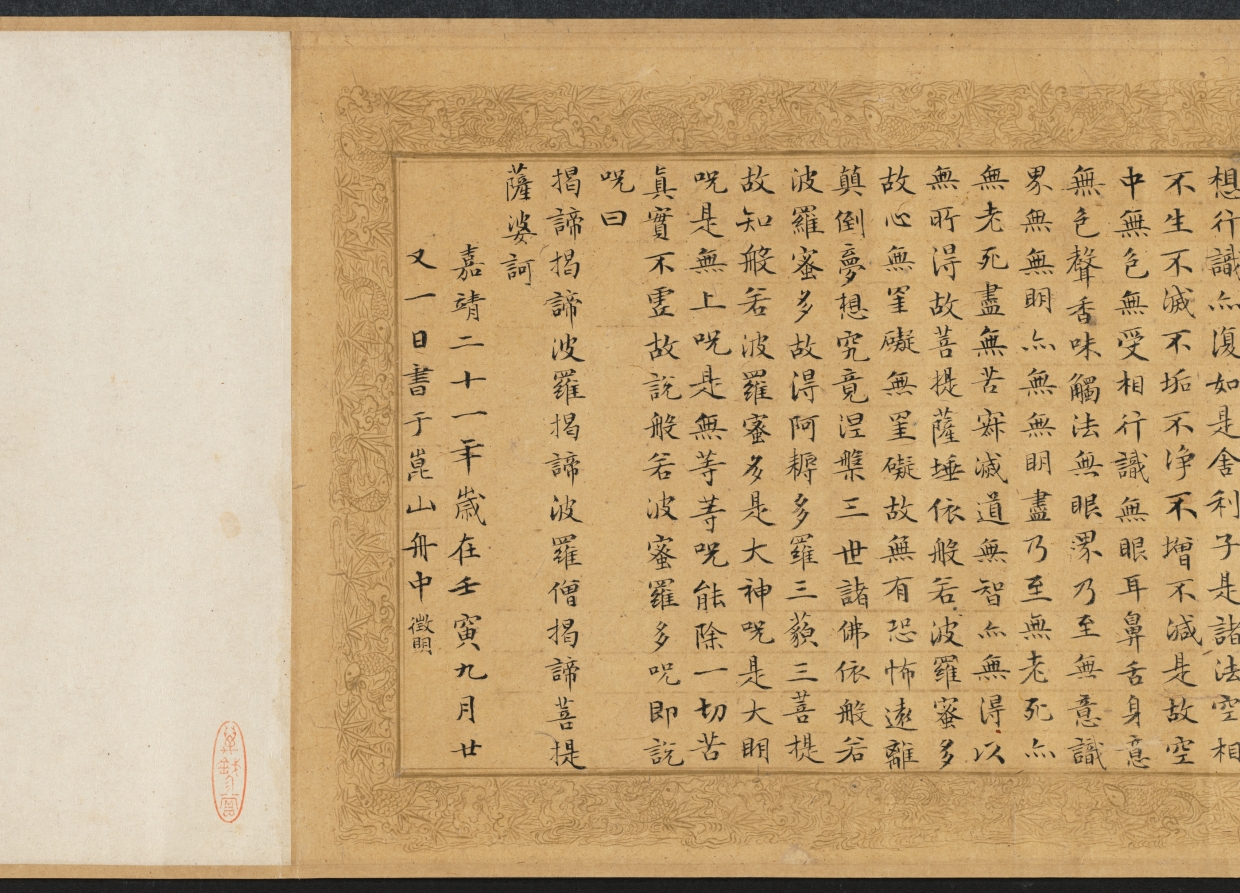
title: Zhao Mengfu Writing the Heart (Hridaya) Sutra in Exchange for Tea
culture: China, Ming dynasty (1368–1644)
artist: Qiu Ying (Chinese, 1494–1552)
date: 1542–43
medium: handscroll, ink and light color on paper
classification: Painting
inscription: Inscription accompanying text of "Heart" sutra, by Wen Zhengming 文徵明 (1470-1559): Zhengming 徵明, written in a boat at Kunshan 崑山, on the twenty-first day of the ninth month, in the renyin 壬寅 year, the twenty-first year of the Jiajing era [1542].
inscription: Colophon by Wang Shih-mou: Chou Yü-shün [Feng-lai] of K'un-shan was a scholarly, refined connoisseur of antiquities. He had acquired the poem written by Chao Ch'eng-chih [Chao Meng-fu] about the exchage of tea for Chao's calligraphy of the Prajna sutra. But the sutra itself, also written by Chao Meng-fu, is lost. He therefore asked Ch'iu Shih-fu [Ch'iu Ying] to do a painting and had Wen Cheng-ming, the artist-in-attendance, write the Hridaya Sutra in the "small, regular" style for replacement. Both works are so excellent that even Chao Meng-fu himself would certainly applaud if he should be reborn to see them. I, Shih-mou, had gotten possession of this scroll from the family of Chou Yü-shün, and since it was so wonderfully matched with one of the treasures in my collection. the Hridaya Sutra written by Chao Meng-fu for Priest Li in "running script," like the reuniting of two halves of a jade pi, I completed the scroll with the several colophons written for the "tea-exchange" poem. I did this because the painting of Ch'iu Ying and the calligraphy of Wen Cheng-ming are definitely masterpieces by themselves with absolutely no need to depend on any of the colophons written for the Chao Meng-fu poem. Furthermore, the two sons of Wen Cheng-ming, Shou-ch'eng [Wen P'eng] and Hsiu-ch'eng [Wen Chia]. have each written a colophon explaining the reason for replacing the calligraphy. As their writings are both acceptable for high standard, I didn't want to throw them away. [So by separating these into two scrolls] I was able to get two complete works of art in one clever stroke. I was quite pleased with myself, and hope that those who see this scroll shall not get suspicious because of the missing colophons. Wang Shih-mou wrote in his Jih-sun-chai study, on the first day of the tenth month, in the chia-shen year of the Wan-li era [1584].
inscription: Colophon by Wen P'eng: I-shao [Wang Hsi-chi] wrote in exchange for a flock of geese. Su Tung-po wrote in exchange for meat. Both episodes have become legends of a thousand years. Sung-hsüeh [Chao Meng-fu] "teased" Priest Kung for tea, and the story was immediately immortalized in the poems by all the famous scholars of the times. Indeed, how could one say his humor and elegance are not equal to the ancient worthies? Unfortunately, the poetry has survived but the writing of the sutra is lost. Yü-shün [Chou Feng-lai] therefore asked my father to make up the writing and so here is the complete work of art. Respectfully inscribed by Wen P'eng in the mid-summer of 1543.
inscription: Colophon by Wen Chia: Sung-hsüeh [Chao Meng-fu], in exchanging tea leaves for his writing of the Prajna, had put himself in the company of Yu-chün [Wang Hsi-chih] who exchanged geese for his writing of the Huang-t'ing sutra [the Yellow Chamber, or the Wai-ching ching, a Taoist text attributed to the Yellow Emperor]. However, was this romantic and cultivated gesture really intended for such small things? Actually, he was only proud that the excellence of his calligraphy had made him worthy to be the successor of the Ch'in Dynasty master. Since, very unfortunately, Chao Meng-fu's writing [of the Prajna] was already lost, my father therefore agreed to replace it, and did the calligraphy in the style of the Yellow Chamber. In addition, Yu-shün [Chou Feng-lai] had asked Mr. Ch'iu Shih-fu [Ch'iu Ying] to do a painting of the sutra writing story in the style of Li Lung-mien at the head of the scroll. Now it would seem the entire episode should go down in history for immortality. Respectfully recorded by Wen Chia, on the eighth day of the eighth month, in the year of k'uei-mao [1543]. trans. WKH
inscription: 4 colophons and 23 seals: 1 colophon, dated 1543, and 2 seals of Wen Peng (1498-1573); 1 colophon, dated 1543, and 2 seals of Wen Chia (1501-1583); 1 colophon, dated 1584, and 3 seals of Wang Shih-mou (1536-1588); 2 seals of Chou Feng-lai (16th c.); 3 seals of Sung Lo (1634-1713); 5 seals of the Ch'ien-lung emperor (r. 1736-95); 1 colophon, dated 1902, and 1 seal of Fei Nien-tz'u (1885-1905); 4 seals of Wan-go H. C. Weng (b. 1918); 1 seal unidentified.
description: The Yuan dynasty calligrapher Zhao Mengfu (1254–1322) is said to have transcribed the Heart Sutra for a certain priest named Li in exchange for tea. Later, during the Ming dynasty, the professional painter Qiu Ying from Suzhou painted this scene for his patron. Here, Zhao Mengfu holds a brush and has a piece of paper laid out before him. On the table is an ink stone, an ink stick, and a small water dropper. Drops of water would dissolve the ink stick into liquid ink when it was ground on the flat square stone.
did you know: Qiu Ying was born to a peasant family, but his natural talent led him to a successful career as a professional painter with wealthy patrons.